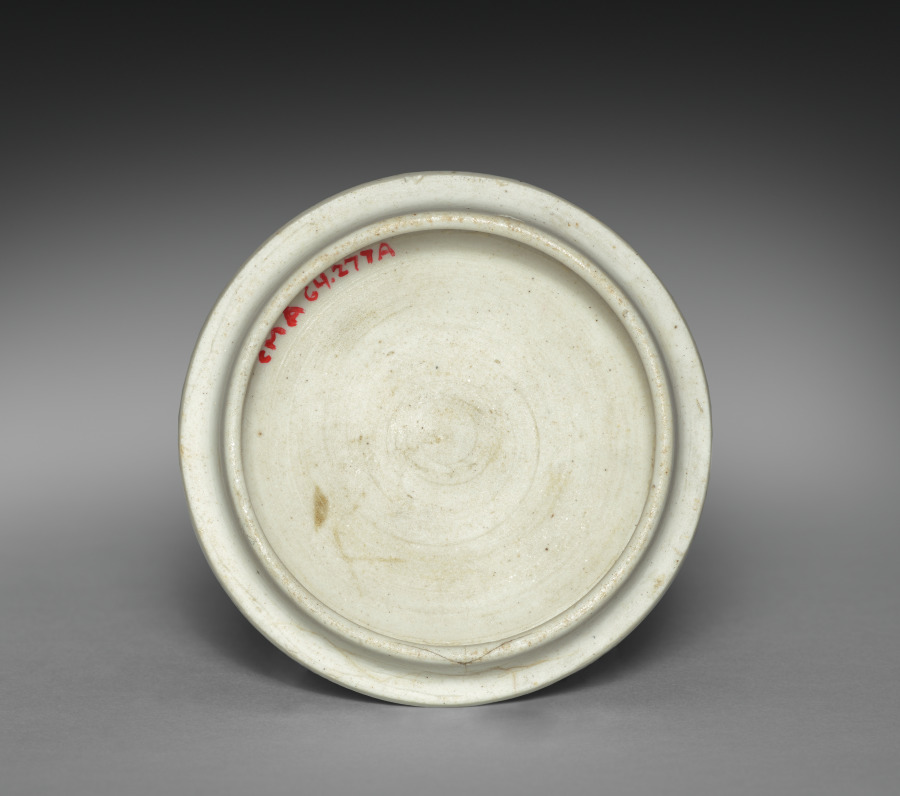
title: Square Jar with Birds and Flowers (lid)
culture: Japan, Edo period (1615–1868)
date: late 1600s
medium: Porcelain with overglaze color enamels and gold (Hizen ware, Kakiemon type)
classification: Ceramic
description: This lidded square jar was likely paired with a complementary yet nonidentical mate. The pine tree, plum, and bamboo together form the frequently depicted motif known as the Three Friends of Winter (shōchikubai), so named because of their hardy perseverance in the cold. Each side also features a pair of birds, including cranes on one face and pheasants on another.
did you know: A jar like this was fired at a high temperature, painted with colored enamels, and then fired again at a lower temperature.